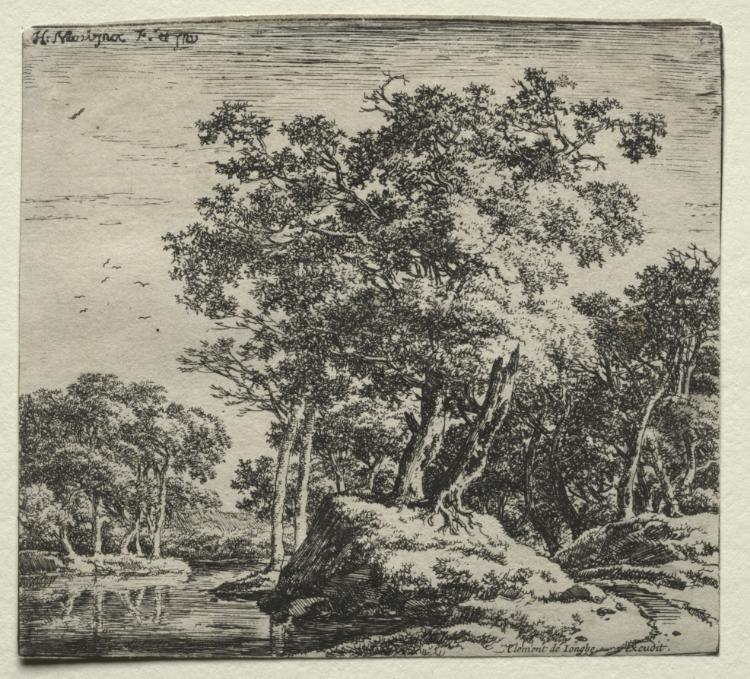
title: The Hill with the Two Large Trees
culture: Flanders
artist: Herman Naiwincx (Flemish, c. 1624–after 1651)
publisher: Clement de Jonghe (Dutch, 1579–1679)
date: 1640–51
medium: etching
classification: Print